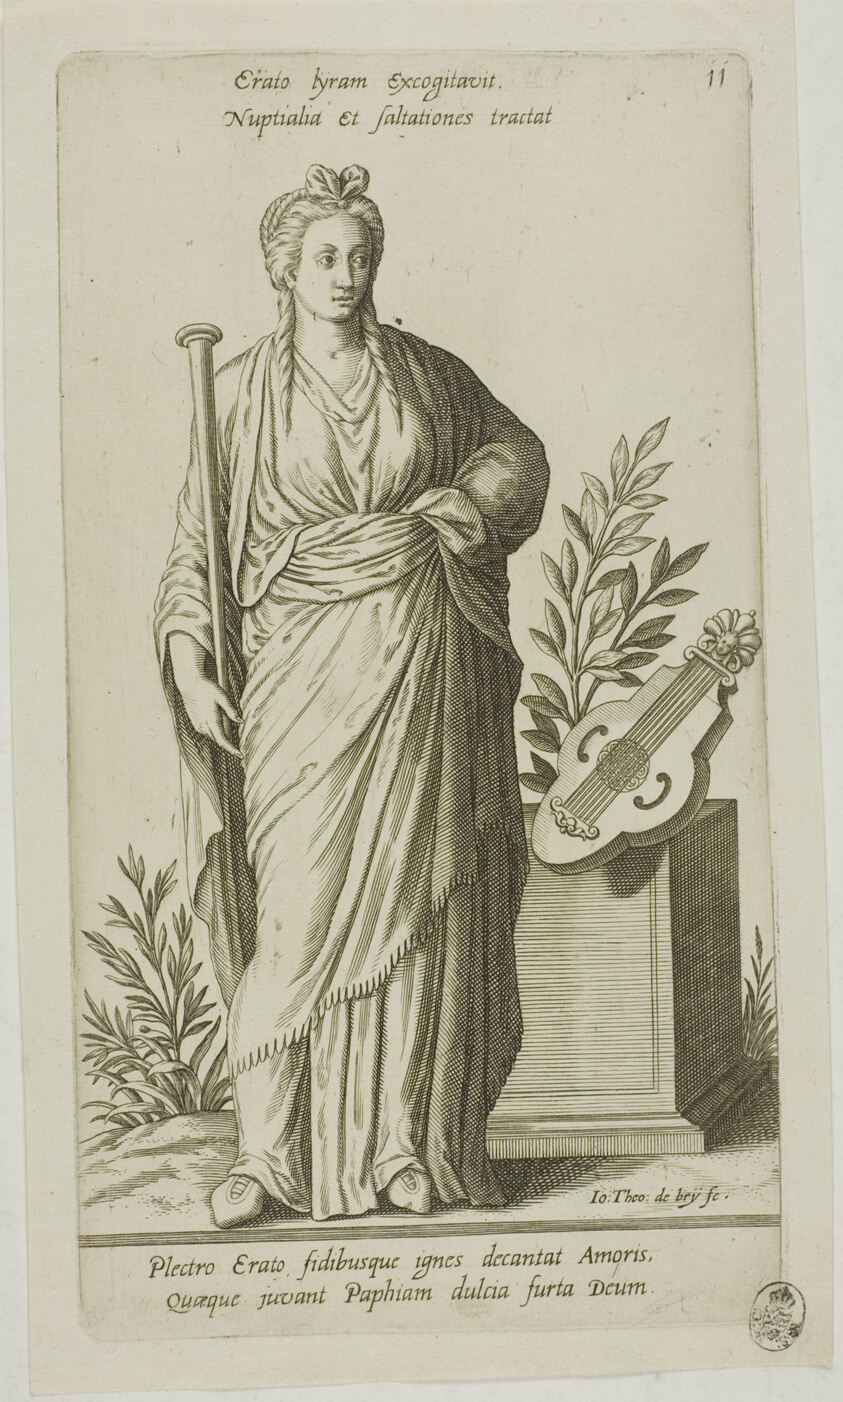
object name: Print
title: Erato, Muse of Lyric Poetry, plate 11 from Parnassus Biceps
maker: Johann Theodor de Bry (German, 1561-1623); after Jean-Jacques Boissard (French, 1533-1598)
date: 1601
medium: Engraving in black on ivory laid paper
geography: Frankfurt an der Oder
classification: engraving; print; prints and drawing